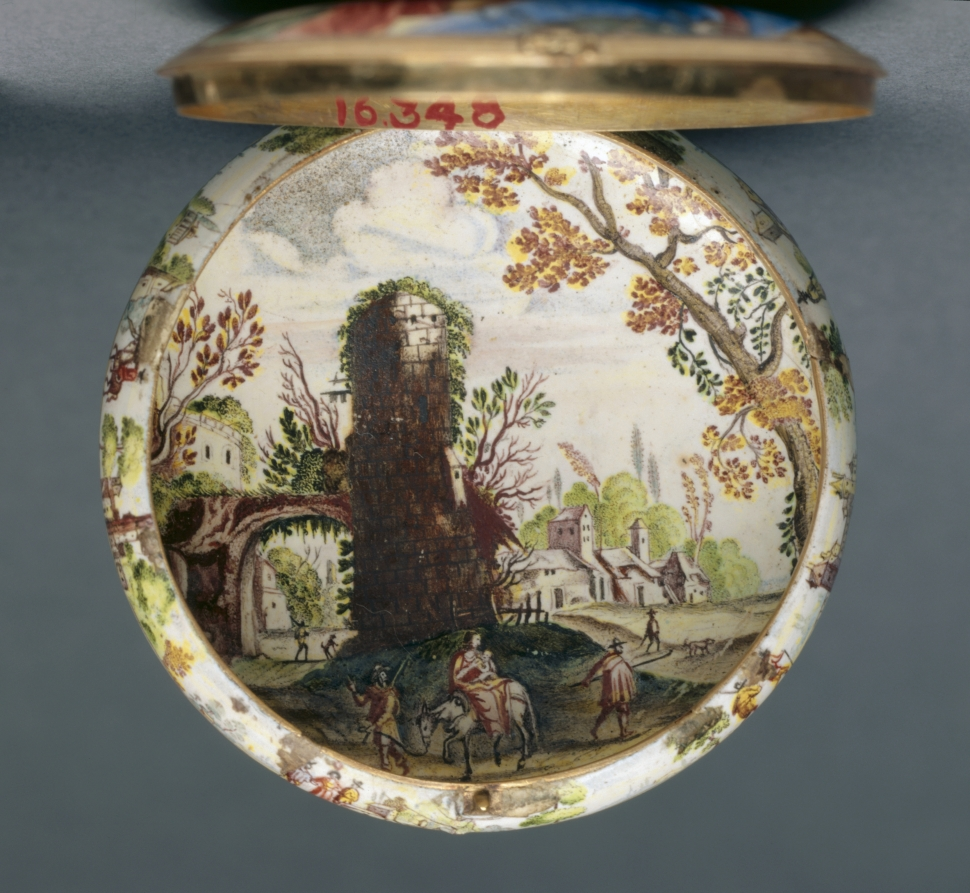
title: Watchcase (Boîtier de montre)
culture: France, 17th century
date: c. 1640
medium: gold and enamel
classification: Jewelry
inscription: [engraved on the rim]: "B8"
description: In the 1630s, the practice of painting with enamel on metal became a means for French miniature painters to achieve a more richly colored, durable product. Previously miniatures were painted with watercolor on vellum, a material made from animal skin. This case would have originally held a watch, but was later transformed into a simple box through the removal of the watch mechanism and ring. This watch case is richly painted inside and out with miniatures modeled after well-known religiously allegorical works.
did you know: Inspiration for the box’s miniatures was drawn from works by Peter Paul Rubens’ The Holy Family with Saints John the Baptist and Elizabeth (1615) (back panel) and Nicolas Cochin (interior base).